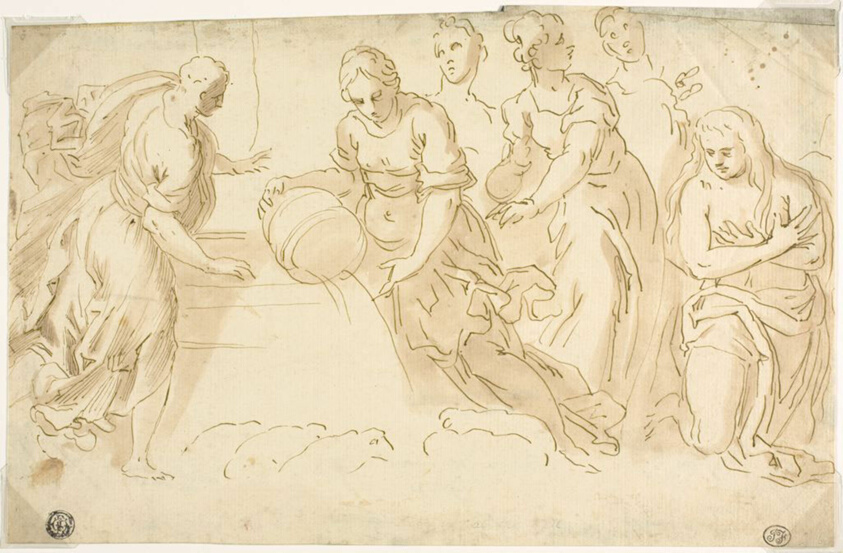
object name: Drawing and Watercolor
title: Jacob and Rachel at the Well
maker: After Jacopo Negretti, called Palma il Giovane; Italian, c. 1548-1628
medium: Pen and brown ink, with brush and brown wash, on ivory laid paper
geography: Italy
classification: ink with wash; drawings (visual works); prints and drawing